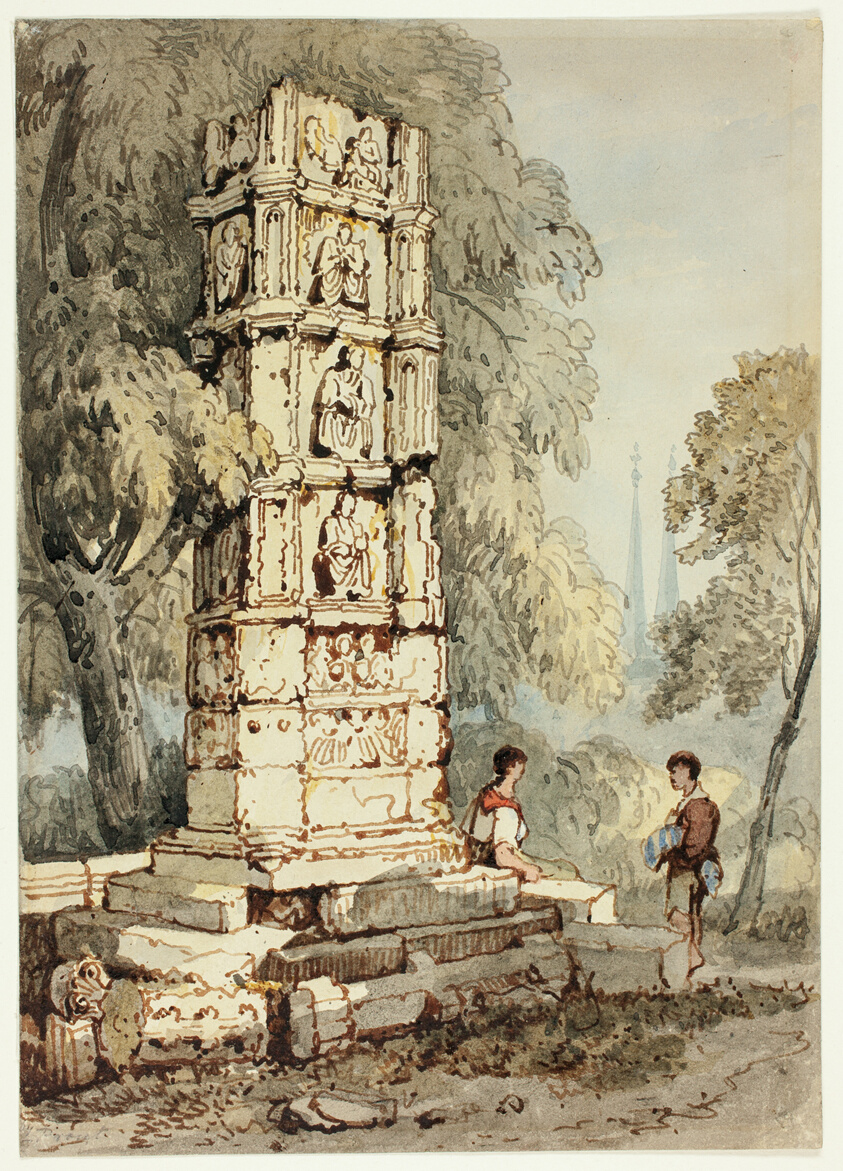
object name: Drawing and Watercolor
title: Two Figures Beside Medieval Ruins, with Church in Distance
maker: Samuel Prout (English, 1783-1852)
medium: Watercolor and brush and brown ink on cream wove paper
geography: England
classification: watercolor; drawings (visual works); prints and drawing